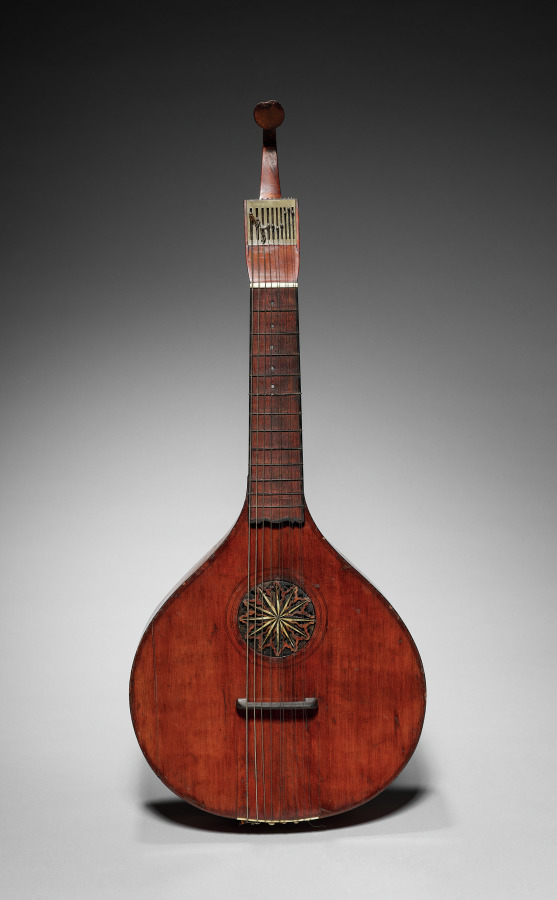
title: Guitar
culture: England, London, late 18th century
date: late 1700s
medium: varnished wood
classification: Musical Instrument